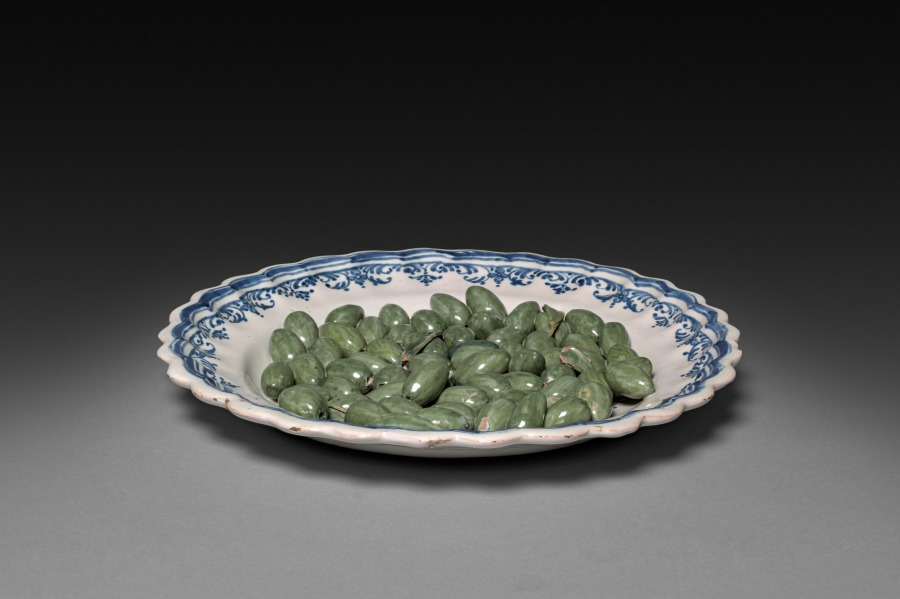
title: Plate of Olives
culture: France, Moustiers(?), 18th century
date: mid 1700s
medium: faience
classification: Ceramic